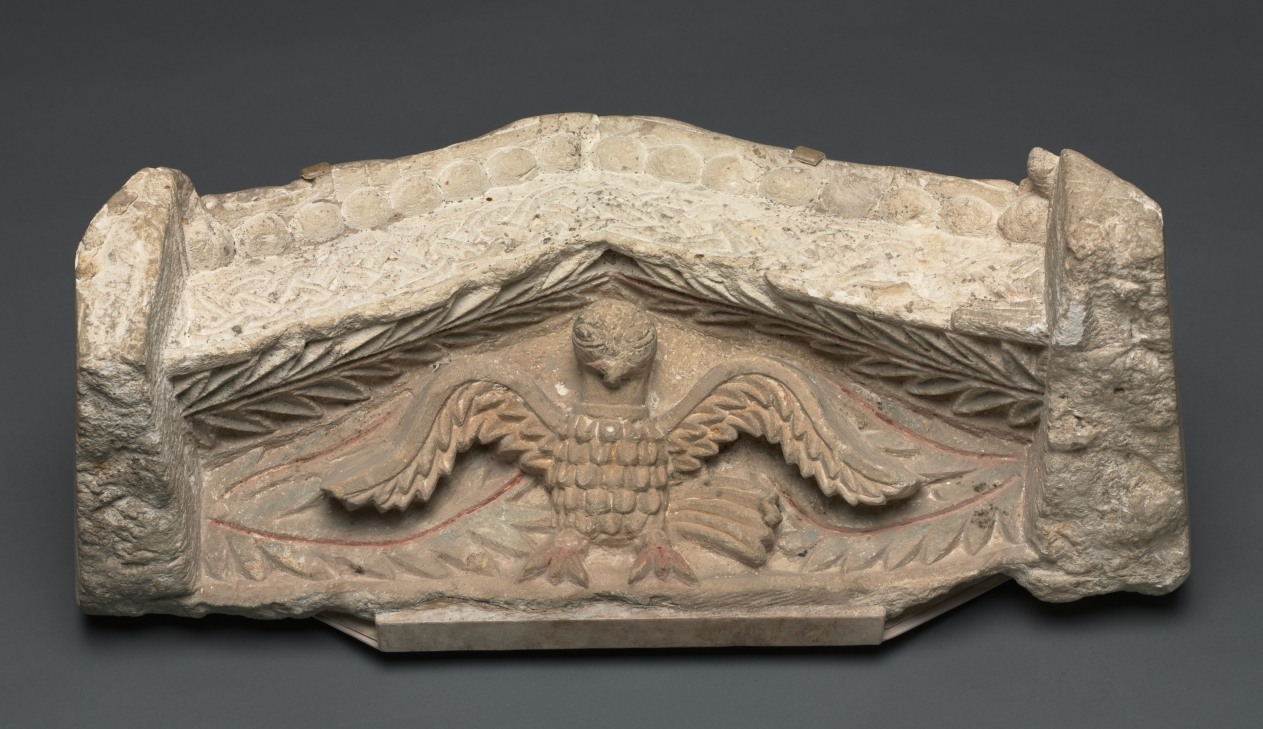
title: Pediment with an Eagle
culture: Egypt, Coptic period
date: 400s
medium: limestone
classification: Sculpture